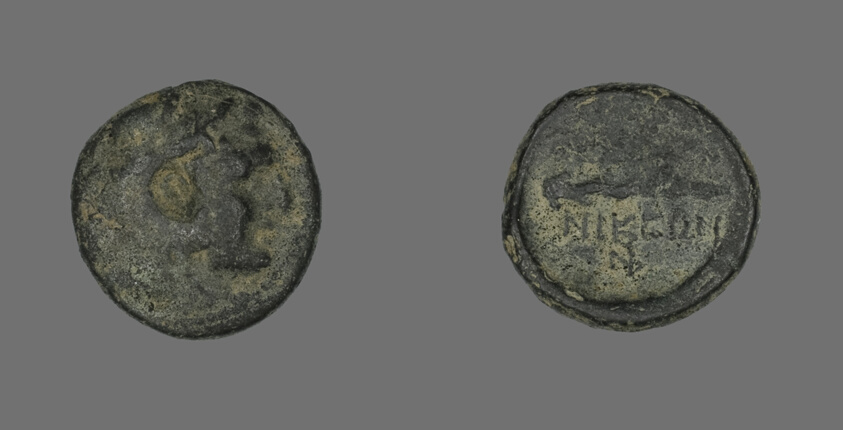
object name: Coin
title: Coin Depicting the Hero Herakles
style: greek, ancient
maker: Greek; Thessalonika, Macedonia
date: about 168 BCE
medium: Bronze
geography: Ancient Greece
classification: coin; ancient art